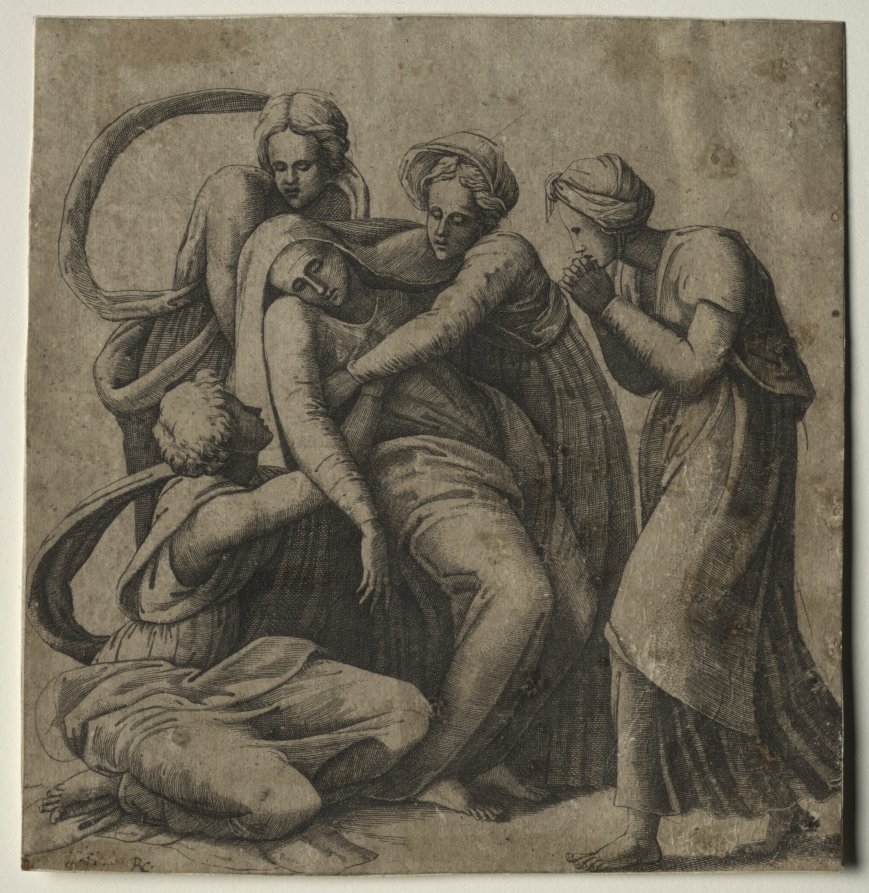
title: The Virgin Fainting in the Arms of Three Holy Women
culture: Italy, 16th century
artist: Giulio Bonasone (Italian, c. 1510–after 1576)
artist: after Raphael (Italian, 1483–1520)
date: mid-1500s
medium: engraving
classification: Print